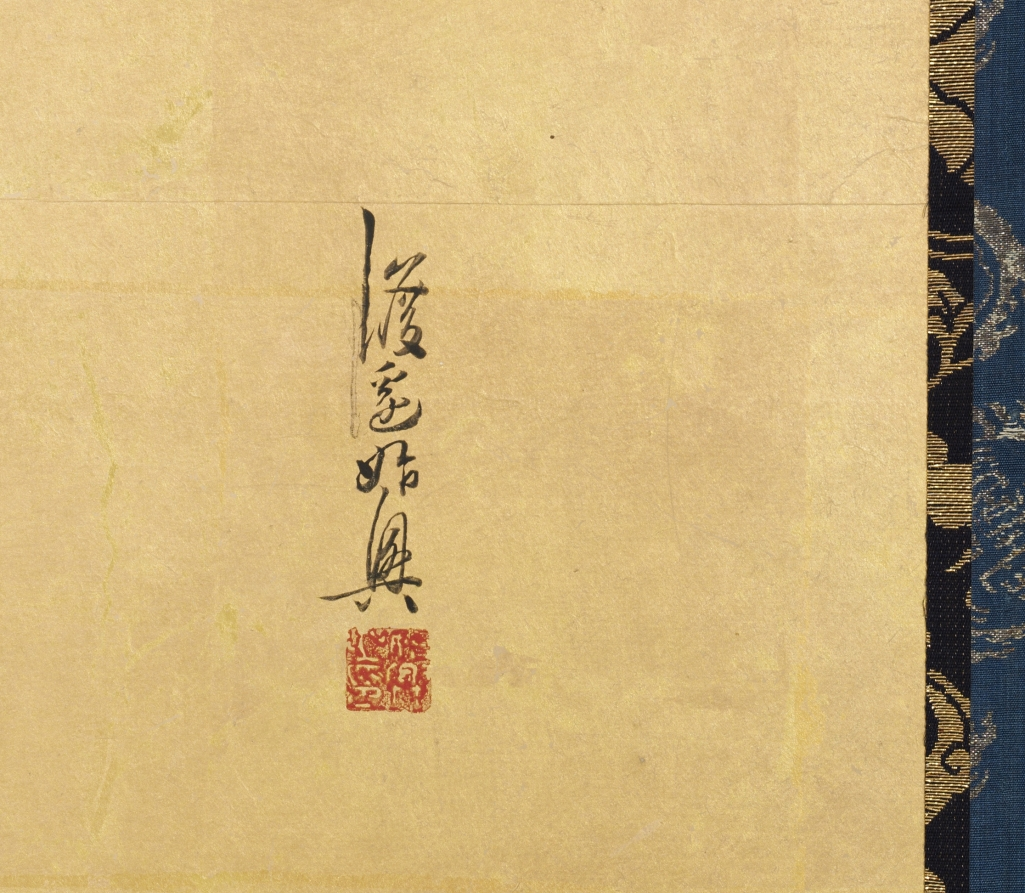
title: Irises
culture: Japan, Edo period (1615–1868)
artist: Watanabe Shikō (Japanese, 1683–1755)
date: 1700s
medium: One of a pair of six-panel folding screens, ink and color on gilded paper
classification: Painting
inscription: signed and sealed lower left of the first panel from the left.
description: The subject of this painting comes from a 10th-century text. It tells of a young nobleman’s journey into the lonely countryside, far from the capital city of Heian-kyō (Kyoto). There he came upon a small stream, the banks of which were covered with blooming irises, on which the artist has chosen to focus our attention. While viewing the beautiful flowers the nobleman composed a poem: I have a beloved wife, Familiar as the skirt of a well-worn robe, And so this distant journeying Fills my heart with grief.